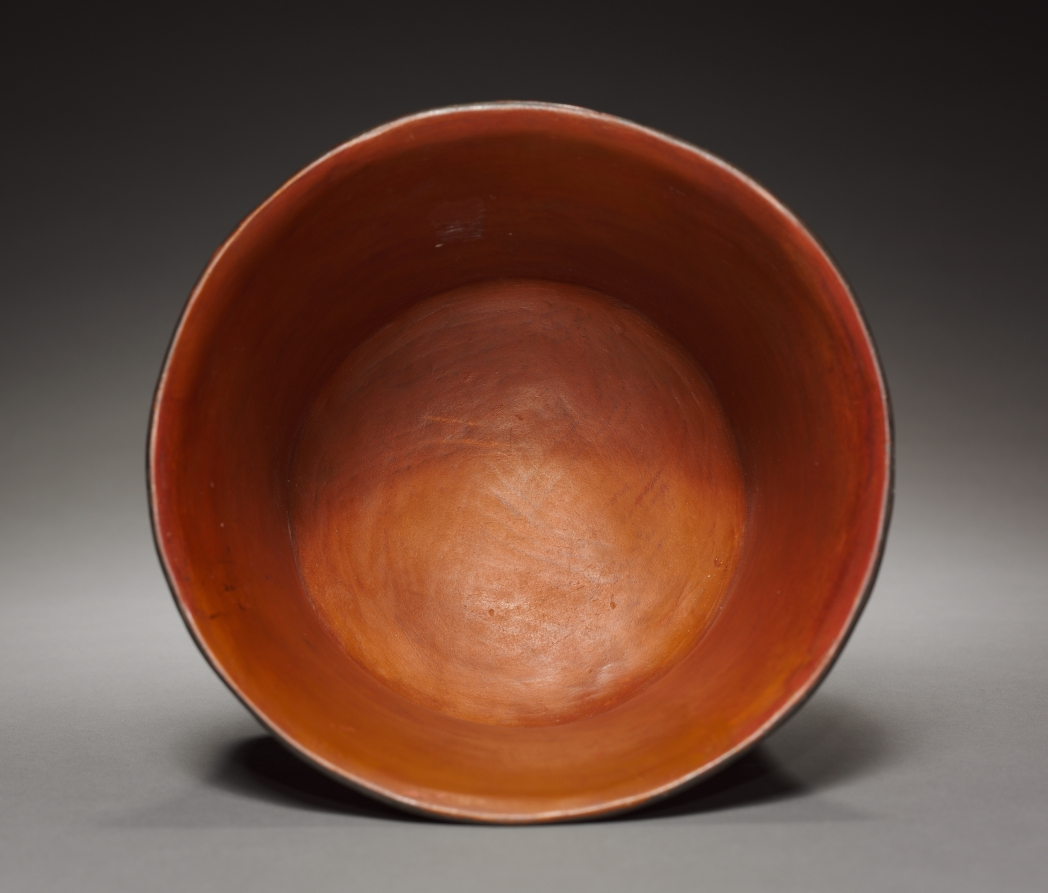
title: Bowl with Costumed Being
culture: Peru, South Coast, Nasca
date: 100 BCE–700 CE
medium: earthenware with colored slips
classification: Ceramic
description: Supernatural figures like the one on this bowl are shown wearing ornaments that actually exist-like the nearby Mouth Mask-they may represent humans clothed as deities who served as living cult images during rituals. The figure holds a severed head that probably alludes to capture of an enemy’s life force, since severed heads and fertility are linked in Nasca art.